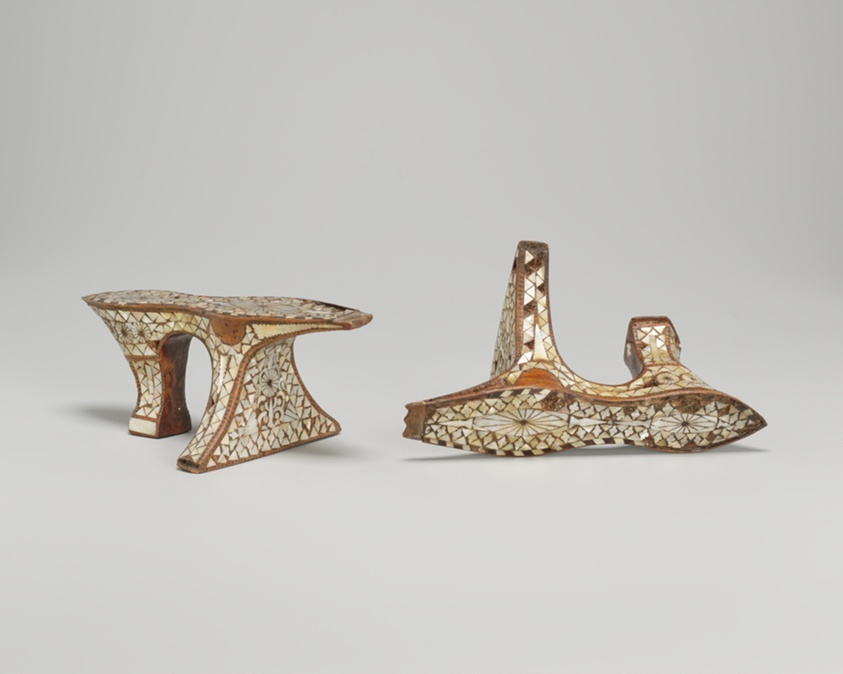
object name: Textile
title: Pair of Clogs (Qabqab)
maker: Algeria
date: Mid–19th century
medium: Wood inlaid with mother of pearl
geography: Algeria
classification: textile; costume accessory - shoe; shoes - misc; costume; dress (garment); clothing